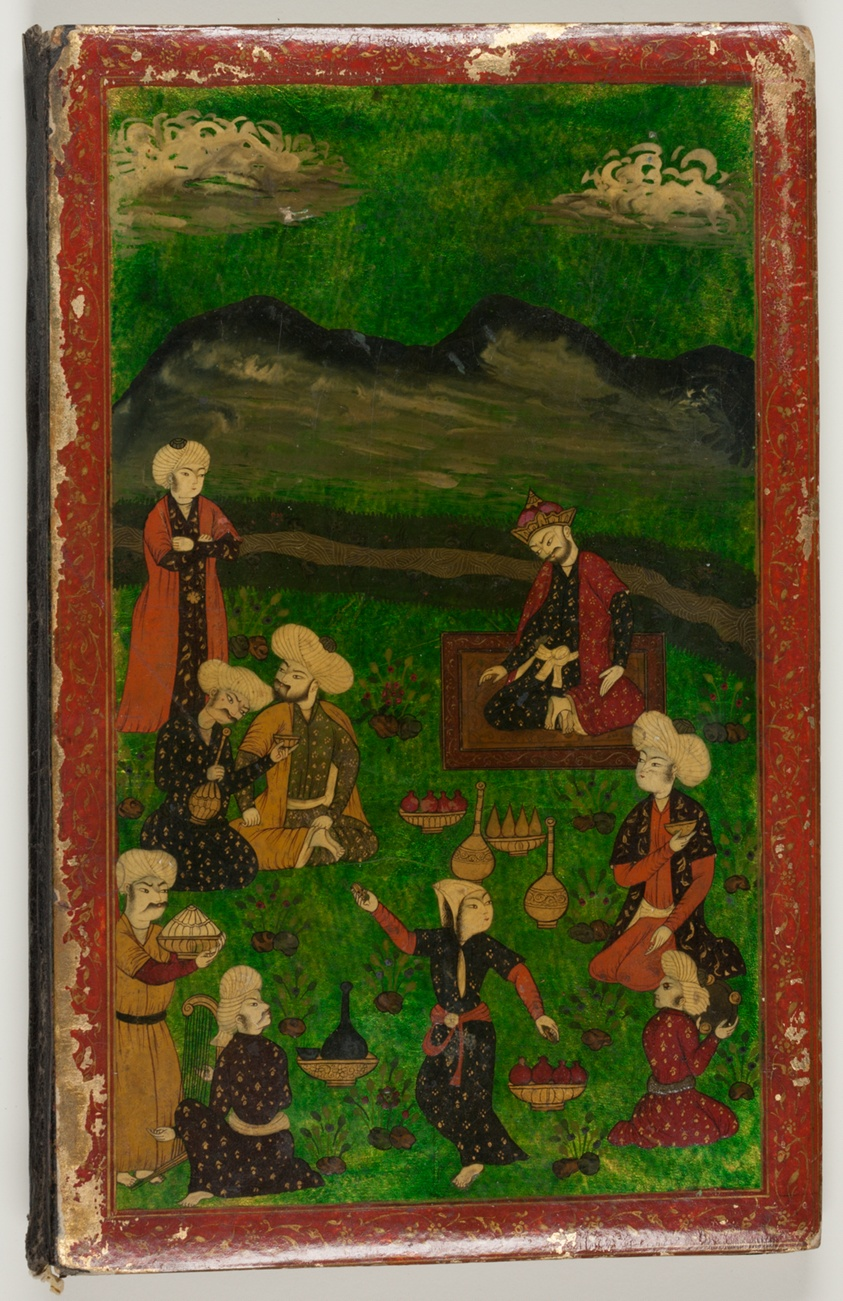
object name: Book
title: Manuscript of Kulliyat (Complete Works) by Sa'di with Lacquered Cover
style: safavid, iran, Islamic, persian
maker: Iran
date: Safavid Dynasty (1501-1736), 17th century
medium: Cover: lacquered leather, Manuscript: ink, opaque watercolor, and gold on paper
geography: Iran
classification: book; asian art; persian; iran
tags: poetry, dancers, iran, islamic, king